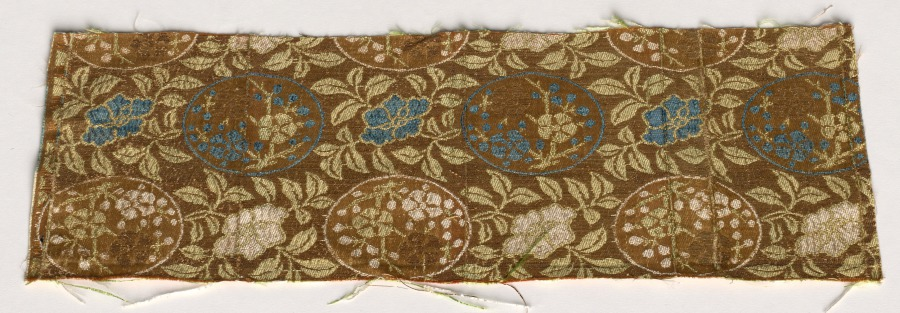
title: Textile Fragment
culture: Japan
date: 1800s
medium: silk, metallic thread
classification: Textile